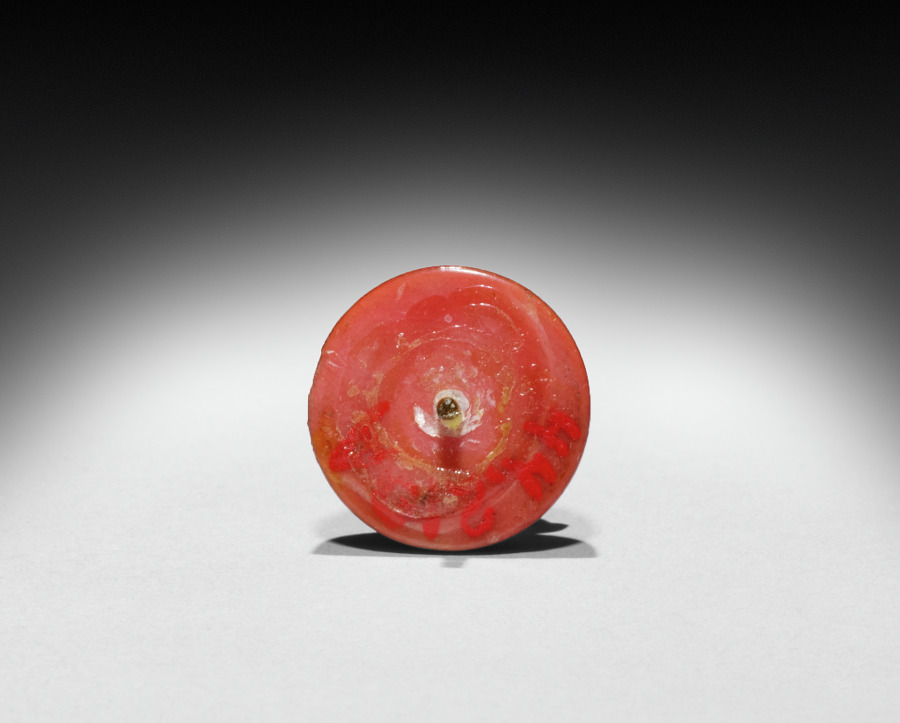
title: Flattened Ovoid Snuff Bottle with Stopper (stopper)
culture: China, Jiangxi province, Jingdezhen kilns, Ming dynasty (1368-1644), Wanli reign (1572-1620)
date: 1573–1620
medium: porcelain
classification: Ceramic